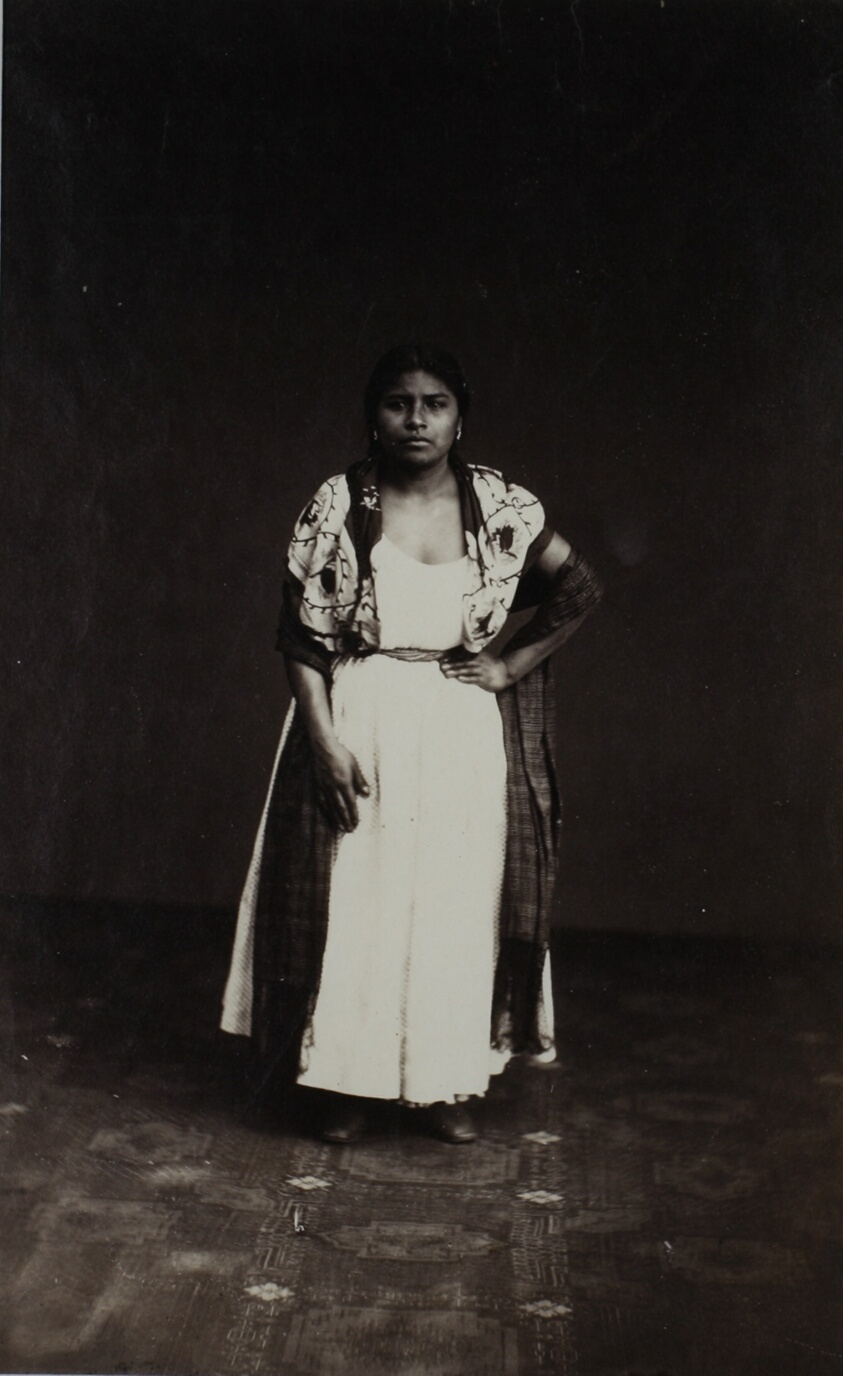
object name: Photograph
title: Study of Indian Girl, Mexico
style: 19th century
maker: Imprimerie d'Aubert et Cie. (Aubert & Co.); French, 19th century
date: c. 1864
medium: Albumen print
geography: France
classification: photograph; albumen silver print; photography